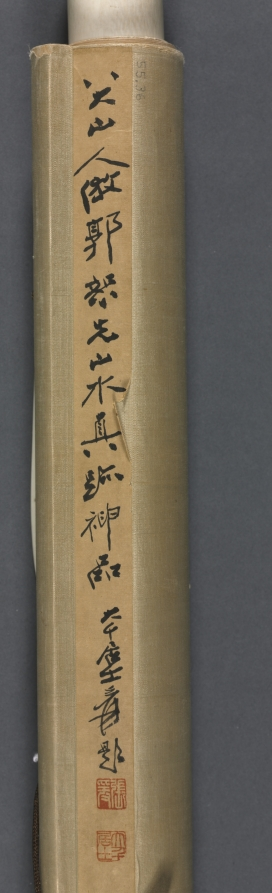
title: Landscape after Guo Zhongshu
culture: China, Qing dynasty (1644-1911)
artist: Bada Shanren (Chinese, 1626–1705)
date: c. 1680–1705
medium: Hanging scroll; ink on paper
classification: Painting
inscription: Artist's inscription, signature, and 3 seals: Painting after Guo Shuxian [Guo Zhongshu]. Bada shanren. [2 seals] Shanren; Kede shenxian 可得神仙. [seal, lower left corner] Yaozhu 遥属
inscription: 8 additional seals: 1 of Li Shifen (1821-1885); 4 of Chang Yüan 張爰 [Zhang Daqian 張大千] (1899-1983); 3 unidentified.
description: Similar to some calligraphers of his time, Zhu Da rejected conventions in favor of an individual, personal expression. He is known for ambiguous compositions of fish, flowers, birds, and rocks in contrasting ink tonality. As a member of the Ming imperial family, Zhu lost his princely status and hid in a monastery when the Manchus, foreigners from the north, established the Qing dynasty in 1644. In this late work, mountain ranges are rendered in diverse and dense strokes rising toward the top of the scroll. It references the artist Dong Qichang (1555–1636) in concept. Yet the cursory brushwork and composition present Zhu’s personal style.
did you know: Zhu Da's inscription acknowledges that this painting was done after the early Song master Guo Zhongshu 郭忠恕, but there is almost no tangible stylistic relation to be found between Zhu Da and his 10th-century model.